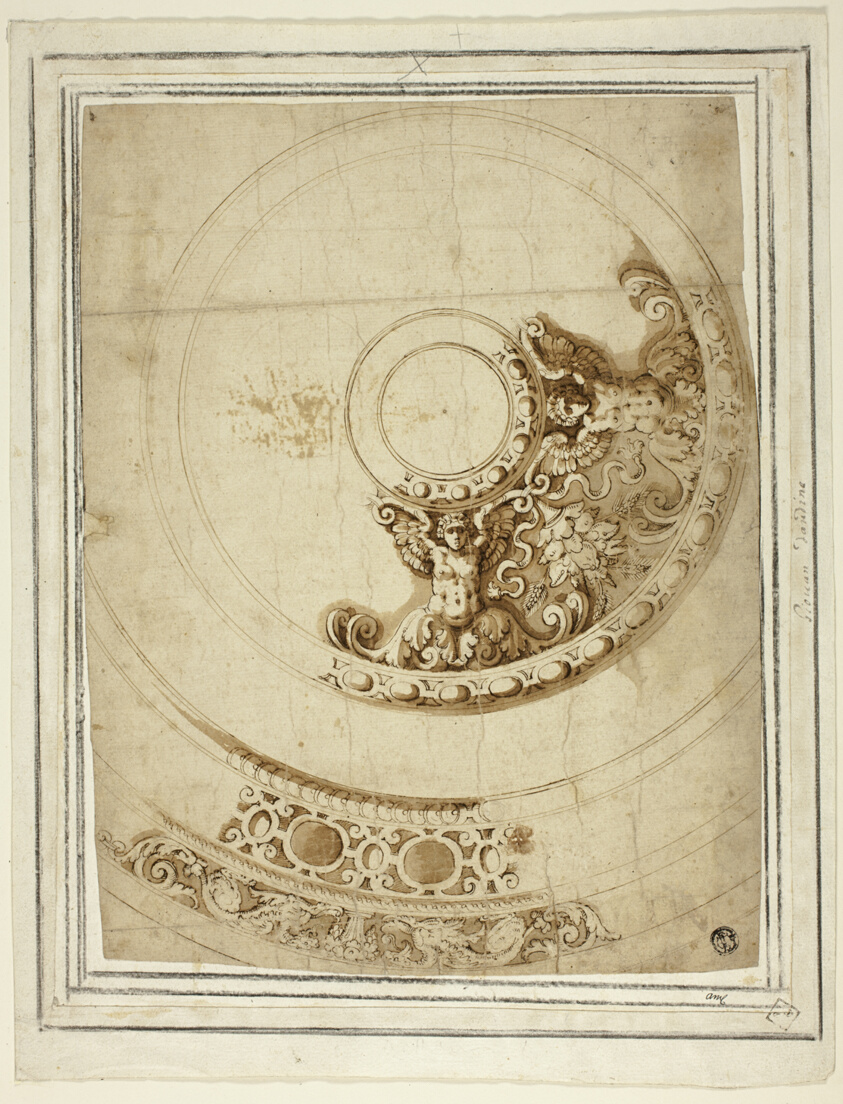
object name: Drawing and Watercolor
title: Design for a Platter or Basin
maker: Italian; Late 16th Century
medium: Pen and brown ink with brush and brown wash, on buff laid paper, with incising, laid down on ivory laid paper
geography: Italy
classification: ink with wash; drawings (visual works); prints and drawing